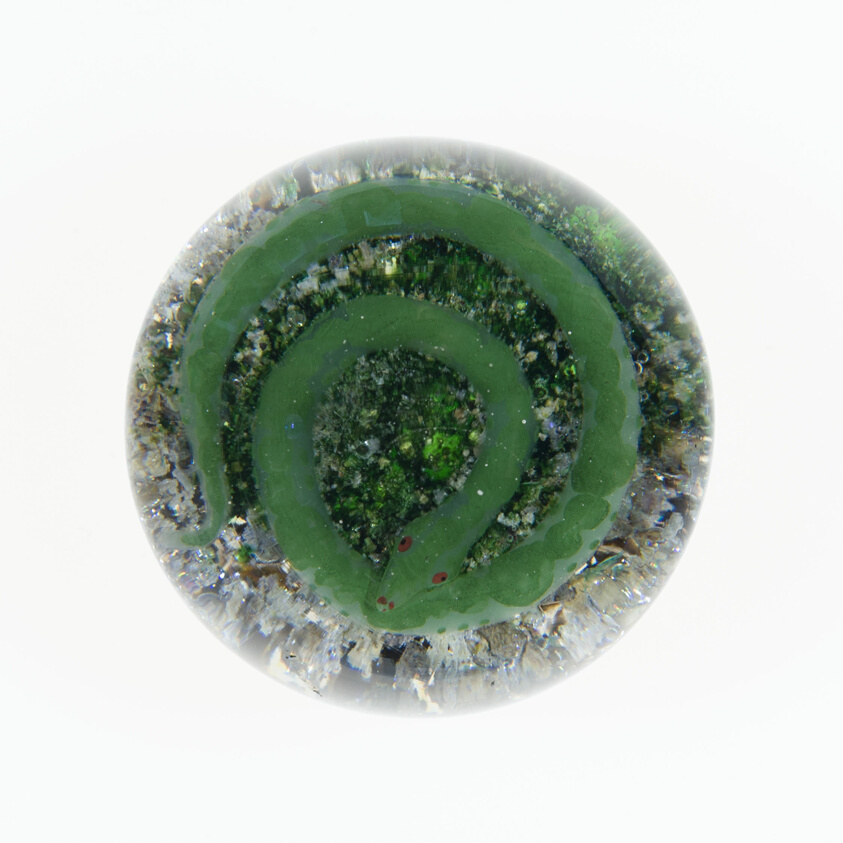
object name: Glass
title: Paperweight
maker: Baccarat Glassworks (Cristalleries de Baccarat); Lorraine, France, founded 1764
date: c. 1848–55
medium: Glass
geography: Baccarat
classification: paperweight; glass